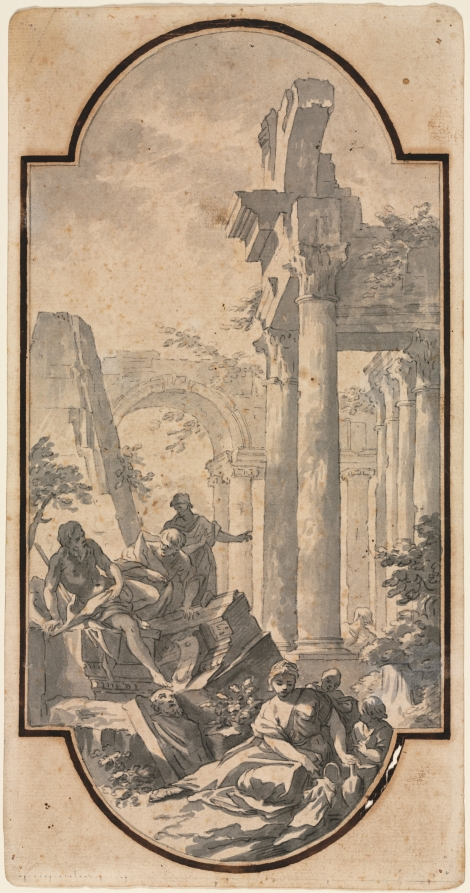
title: Figures Near the Ruins of a Corinthian Temple (recto)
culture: Italy, 18th century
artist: Andrea Locatelli (Italian, 1695–1741)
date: first half 1700s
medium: brush and black and gray wash, over traces of black chalk; framing lines in black chalk, and brown ink (iron gall)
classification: Drawing